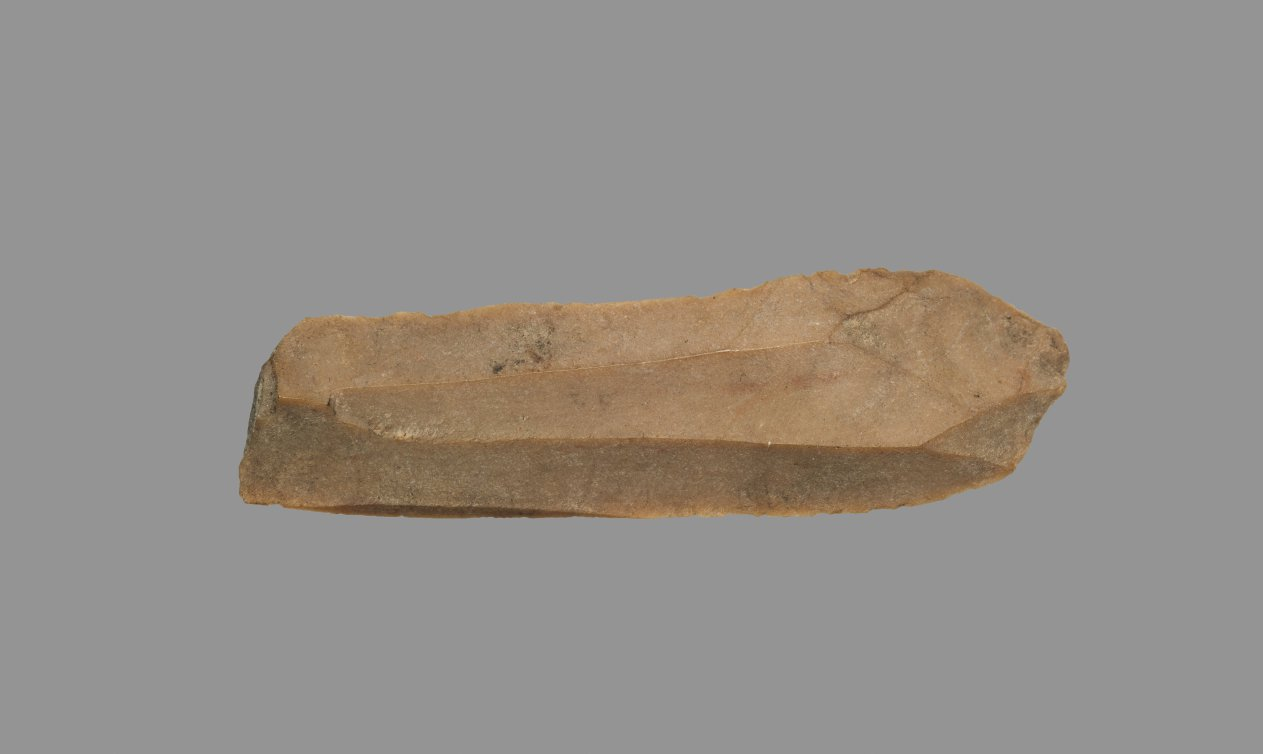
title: Sickle Blade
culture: Egypt, Middle Kingdom (2040–1648 BCE), Dynasty 12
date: 1980–1801 BCE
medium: flint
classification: Implements